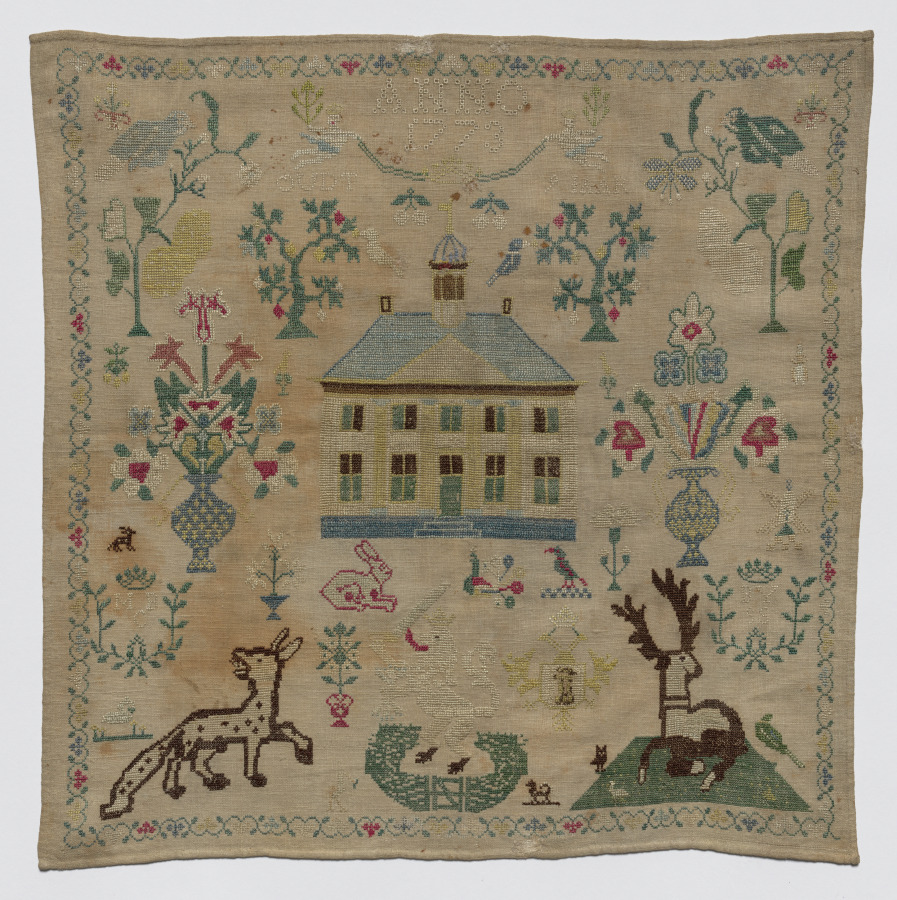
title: Sampler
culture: Netherlands, late 18th century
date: 1773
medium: embroidery; silk on cotton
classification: Sampler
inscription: above house in center: "ANNO/ 1773"; to left of this: "OUDT 9"; to right: "JAAR" (ninth year); enclosed in wreaths in lower section: "M.B.C." and "B.Y.S.S."